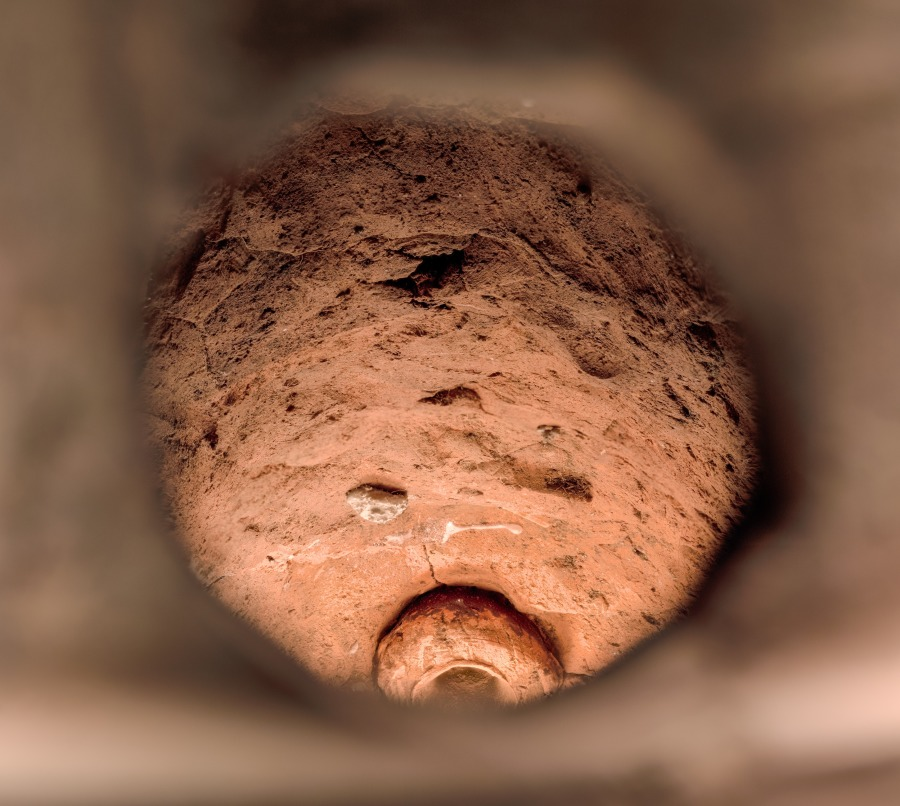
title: Haniwa Horse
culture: Japan, Kofun period (300–710 CE)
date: 400s–500s CE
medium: earthenware with traces of pigment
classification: Sculpture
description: This horse’s tack, with its round bells, resembles saddlery in fashion in Korea during the 400s–500s CE. Concurrent with mass migration from the Korean Peninsula, tombs covered with large earthen mounds similar to those on the Asian continent began to appear in Japan around the year 300 CE. Called “old mounds” (kofun), their surfaces were covered with hollow clay cylinders (haniwa). Sculptures of animals, buildings, and finally human figures followed, developing over the ensuing three centuries.